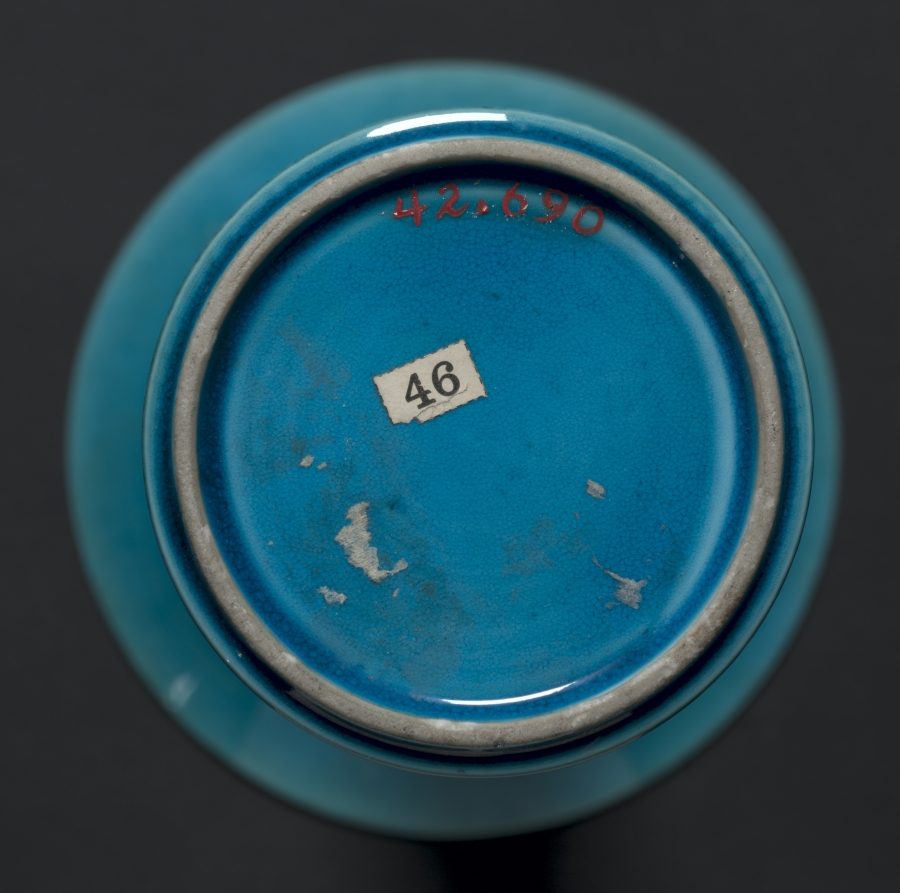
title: Beaker Vase in Form of Archaic Gu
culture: China, Jiangxi province, Jingdezhen kilns, Qing dynasty (1644-1911), Kangxi mark and reign (1662-1722)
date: 1662–1722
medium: porcelain with peacock-blue glaze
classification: Ceramic